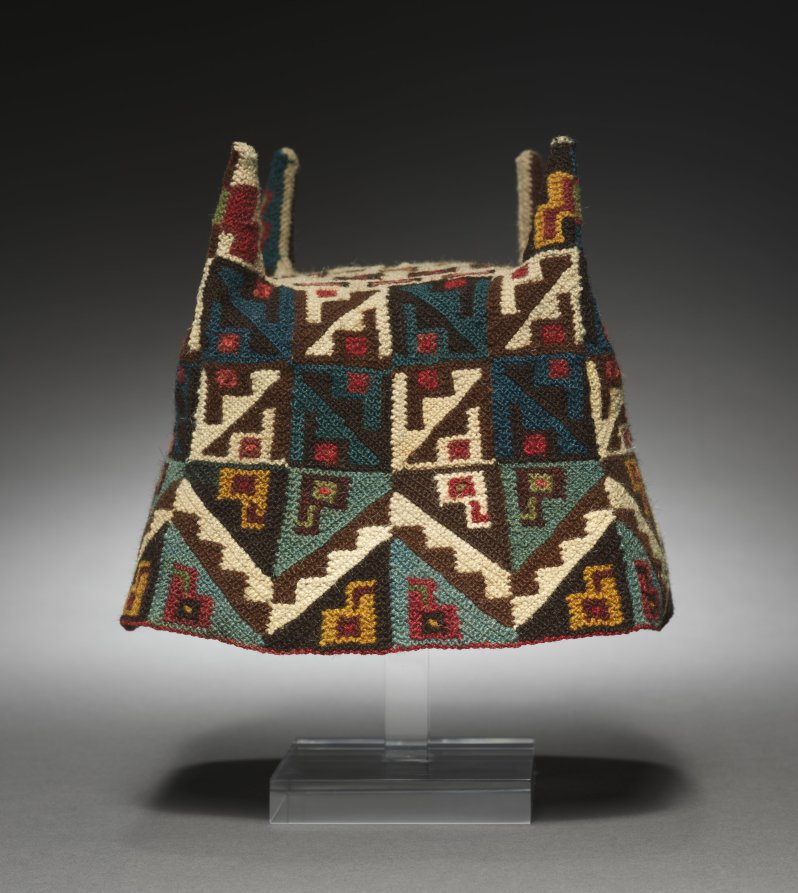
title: Four-Cornered Hat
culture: Peru, South Andes or Chile, Northern Andes, Tiwanaku style, 5th-10th Century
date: c. 400–1000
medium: alpaca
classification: Textile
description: A distinctive type of Tiwanaku and Wari headgear was a hat with four ear-like peaks rising from the corners. Depicted on warriors and other men who wear prestigious clothing and ornaments, the hats were made with knots, visible on all sides of this handsome Tiwanaku example. The hat is decorated with a pattern that includes a profile bird head.